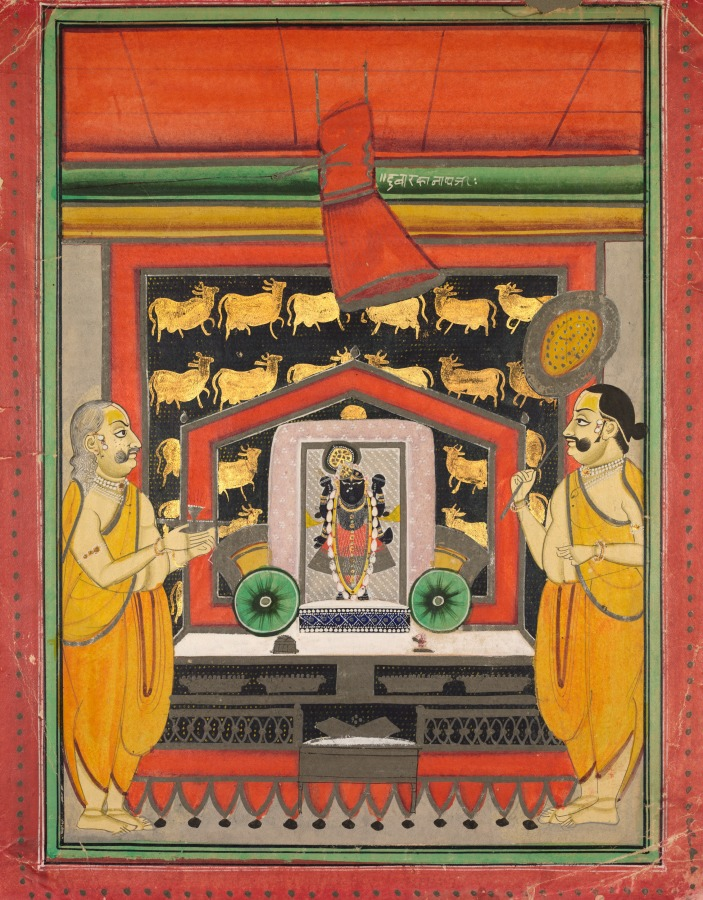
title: Worship of Dvaraka Nathji at Kankroli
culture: Northwestern India, Rajasthan, Rajput Kingdom of Kota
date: c. 1880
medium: Gum tempera and gold on paper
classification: Painting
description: The four-armed sculpture on the altar is understood by followers of the Pushti Marg system as a living embodiment of Krishna, who generated another pair of arms when playing hide-and-seek with his favorite milkmaid, Radha. The sculpture is called Dvaraka Nathji, and his shrine is located in Kankroli, near Nathdwara in northwestern India. The golden cows adorn a textile backdrop (pichvai) behind the sculpture and reference Krishna’s youth in a cowherd village.